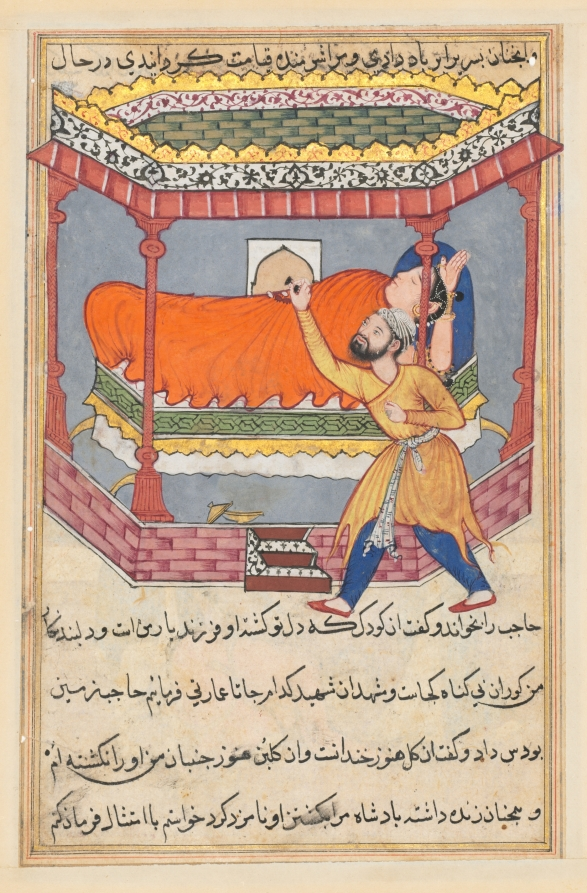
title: The king places the talisman on his sleeping wife, from a Tuti-nama (Tales of a Parrot): Fiftieth Night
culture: Mughal India, court of Akbar (reigned 1556–1605)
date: c. 1560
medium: gum tempera, ink, and gold on paper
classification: Painting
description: The king, believing that his wife has carried on an affair with a slave, acquires a talisman that will make her tell the truth. She reveals that the young man is not her lover, but her son from a former marriage. In reality, the talisman is not magic but is instead part of a plan to prove the wife’s innocence.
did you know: The king believes that the talisman is made of King Solomon’s amulets.